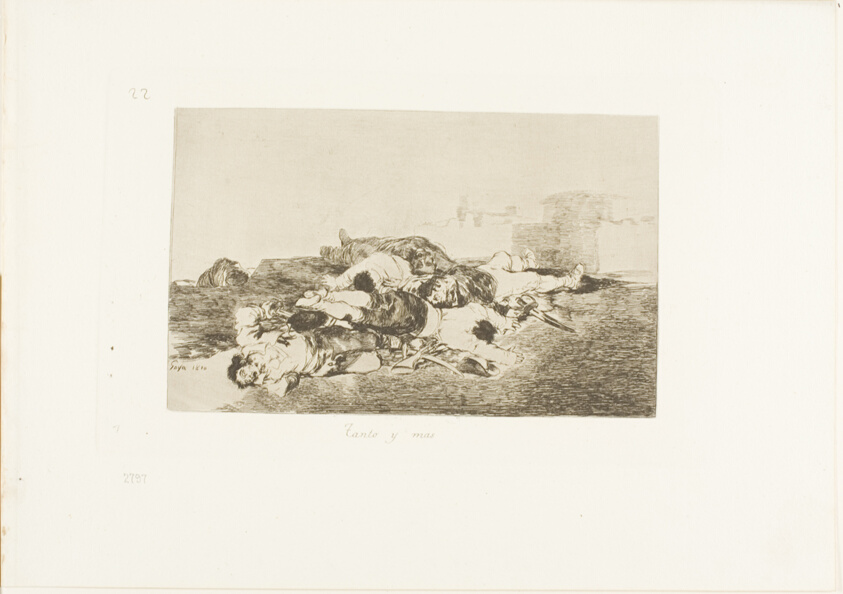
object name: Print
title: Even Worse, plate 22 from The Disasters of War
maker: Francisco José de Goya y Lucientes (Spanish, 1746-1828)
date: 1810, published 1863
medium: Etching, lavis and burin on ivory wove paper with gilt edges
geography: Spain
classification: etching; print; prints and drawing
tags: war